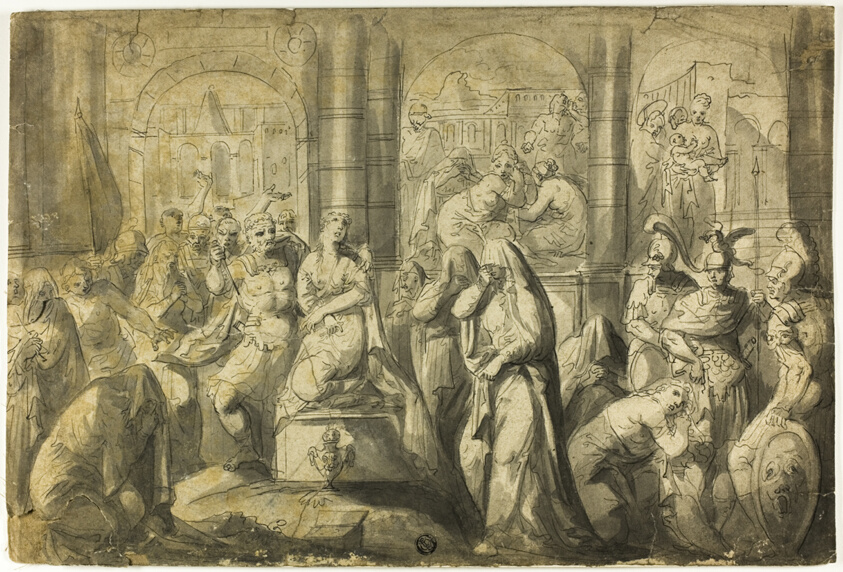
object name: Drawing and Watercolor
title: Sacrifice of Jeptha's Daughter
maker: François Boitard (French, c.1670–c.1715)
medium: Pen and black ink and brush and gray wash on cream laid paper, laid down on fabric, laid down on cream wove paper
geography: France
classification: pen and ink drawings; drawings (visual works); prints and drawing